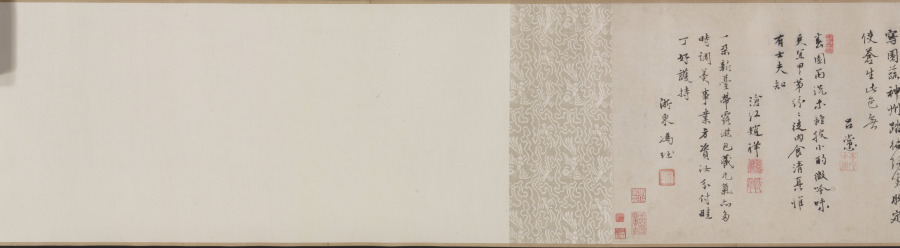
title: Chrysanthemums and Cabbage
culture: China, Ming dynasty (1368–1644)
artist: Tao Cheng (Chinese, active c. 1471–after 1502)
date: c. 1486 or before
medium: handscroll, ink and slight color on paper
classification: Painting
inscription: Artist's seal at beginning of painting: Yun hu 雲湖. Title by Wang Wenzhi 王文治 (1730–1802), date 1756. 2 seals of Wang Wenzhi 王文治 (1730-1802); 3 seals of Ku Yün (n. d.)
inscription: Section A (Chrysanthemums): 1 poem and 1 seal of Zhang Yuanzhen 張元禎 (1437–1507) - Jinshi, 1461; 1 poems and 3 seals of Ni Yue 倪岳 (1444–1501) - Jinshi, 1464; 1 poems and 2 seals of Zhao Xiang 趙祥 (life dates unknown) - Jinshi, 1469; 1 poems and 1 seals of Wu Xixian 吳希賢 (1437–1489) - Jinshi, 1464; 1 poems and 1 seals of Lü Chang 呂㦂 (1449–1511) - Juren, 1471; 1 poems and 3 seals of Fu Han 傅瀚 (1435–1502) - Jinshi, 1464; 1 poems and 1 seals of Feng Jue 馮珏 (life dates unknown) - Jinshi, 1478.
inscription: Chrysanthemums section, poem 1, by Zhang Yuanzhen 張元禎 (1437–1507): Several bushes of chrysanthemums grow in front of the Five-Willow Cottage,/ The yellow ones are really yellow and the white ones white./ This affable and decent fellow, young in years and unsophisticated,/ Has snapped one of the branches to dip in ink. (The Five-Willows Cottage was the home of the poet Tao Qian 陶潛 (Tao Yuanming 陶淵明, AD 365-427).) Chrysanthemums section, poem 2, by Ni Yue 倪岳 (1444–1501): Where at the Eastern Fence can you grieve for the Soul of the Xiang River?/ A man of upright character is mourned within the traces of ink./ White jade with a slight flaw would be a grievance forever,/ Later men should understand why even the roots of the flowers are washed. (Eastern Fence refers again to the poet Tao Qian 陶潛, while the Soul of the Hsiang River refers to the poet Qu Yuan 屈原 (c. 340–278 BC).) Chrysanthemums section, poem 3, by Zhao Xiang 趙祥 (life dates unknown): A clump of chrysanthemum grows in front of the bamboo pavilion,/ The winds of many autumns have blown since we parted beyond the river./ Straining wine through the official's cap of Tao [Qian] to prolong autumn's pleasures,/ The mists and clouds of ten thousand miles belong to the intoxicated. Chrysanthemums section, poem 4, by Wu Xixian 吳希賢 (1437–1489): It is a different spring if mulberry is planted during the latter part of the year,/ The dust of the world originally did not drop on clothing./ Who spills out ink under the Eastern Fence/ And paints so freely this portrait of chrysanthemums for the venerable Sir Tao? Chrysanthemums section, poem 5, by Lü Chang 呂㦂 (1449–1511): This full tray of ink for painting [flowers] at the Eastern Fence;/ Their whiteness or yellowness is not essential in capturing their beauty./ I don't have to go to Jiangnan to see them myself./ At my old house grow two or three branches. Chrysanthemums section, poem 6, by Fu Han 傅瀚 (1435–1502): Who daubed autumn flowers with ink/ As if they were dark dew on a branch tip only vaguely seen at evening?/ After the lazy clouds disperse, no one paints;/ A certain unconventionality pervades this painting. Chrysanthemums section, poem 7, by Feng Jue 馮珏 (life dates unknown): To satisfy his hunger, [the chrysanthemums] have at times entered the poetry of Qu Yuan;/ Taking up the wine cup, it felt close to Tao Qian./ [With them I am like] a lonely root sustained by deep water/ Or an old man to whose hair the color of youth returns.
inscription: Section B (Cabbage): 1 poem and 1 seal of Cai Qi 蔡圻 (life dates unknown) - degree information not known; 1 poems and 3 seals of Ni Yue 倪岳 (1444–1501) - Jinshi, 1464; 1 poem and 3 seals of Jiao Fang 焦芳 (1436–1517) - Jinshi, 1464; 1 poem and 3 seals of Li Dongyang 李東陽 (1447–1516) - Jinshi, 1464; 1 poems and 1 seals of Wu Xixian, signed “Xixian” 吳希賢 - Jinshi, 1464; 1 poems and 3 seals of Fu Han 傅瀚 (1435–1502) - Jinshi, 1464; 1 poems and 1 seals of Lü Chang 呂㦂 (1449–1511) - Juren, 1471; 1 poems and 2 seals of Zhao Xiang 趙祥 (life dates unknown) - Jinshi, 1469; 1 poems and 1 seals of Feng Jue 馮珏 (life dates unknown) - Jinshi, 1478.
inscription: Cabbage section, poem 1, by Cai Qi 蔡圻 (life dates unknown): The ink splashes are fresh from a frosty brush dipped in pond water;/ I can visualize that time when Yunhu 雲湖 [Tao Cheng] first showed his talents./ I lament the places where I scribbled before,/ Who would open them to inscribe a poem? (The first line is an allusion to the famous Jin dynasty calligrapher Wang Xizhi 王羲之 (AD 303-361), who practiced calligraphy so diligently at the edge of a pond that the water turned black with ink.) Cabbage section, poem 2, by Ni Yue 倪岳 (1444–1501): After rain the vegetables begin to grow;/ How are the colors of the masses lately!/ Once you get used to them, the tastiest parts are the ends of the roots;/ I don't know if they can be used for "seasoning soup." ("Seasoning soup" is an allusion to the statesmanship of a chief minister.) Cabbage section, poem 3, by Jiao Fang 焦芳 (1436–1517): This crop of purple stalks and green leaves is late and irregular;/ Now the rainy season is over for the Eastern Garden./ All the nobles nowadays dine on meat;/ Who of them knows the flavor of this [cabbage]. Cabbage section, poem 4, by Li Dongyang 李東陽 (1447–1516): It's always helped the honest man to sober up after drinks./ I intend to go to the deepest part of the stream-crossed garden/ To refresh myself in the fragrance and dew of evening. Cabbage section, poem 5, by Wu Xixian 吳希賢 (1437–1489): After rain, the white silk is filled with fragrant vegetables;/ How many times this happens in Mr. Tao's paintings./ On whom will you depend to present a memorial to the ruler?/ Don't let this color emerge on the faces of the people. (The last line is meant as a warning to officials: the color of the vegetables (green) may be pleasing in itself, but when it emerges on the faces of the starving poor, it signifies a badly governed world.) Cabbage section, poem 6, by Fu Han 傅瀚 (1435–1502): For twenty years I have feasted on the excellent mutton of an official;/ Yet I talk and dream about the garden and its vegetables./ Do not merely say it is good to chew the root of the cabbage--/ You must taste to understand what poverty is. Cabbage section, poem 7, by Lu Chang 呂㦂 (1449–1511): The capital is never a place for an apprentice in the "garden of scholarship."/ Who would write about gardens and vegetables on an examination paper?/ I've walked throughout the country in spring;/ Make sure the people don't show this color. Cabbage section, poem 8, by Zhao Xiang 趙祥 (life dates unknown): After a wash of rain, the spring garden is still in order;/ The flavor [of the cabbage] is more suitable with a small drink and the hum of a tune./ The rich and powerful in their mansions consume dish after dish of meat;/ Vegetarian food is known only by the scholars. Cabbage section, poem 9, by Feng Jue 馮珏 (life dates unknown): A new cabbage is nourished with dew;/ It takes a long time to grow and mature./ The business of "seasoning the soup" is your responsibility;/ Better command the gardener to take care [of the cabbages]. trans. HK/LYSL/WKH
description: On an autumn day in Beijing, Tao Cheng had a gathering with a group of scholar-officials and created two paintings in a spontaneous, casual style. The first depicts chrysanthemums, slender bamboo stalks, and a rock in monochrome ink. Tao applied light colors for the second painting that depicts cabbage. Tao deliberately placed the images on the first sections of the paper so that his honorable guests could add their poetic inscriptions inspired by his imagery. In the first section to the right, all seven poetic inscriptions refer to the beloved poet and recluse Tao Qian (also called Tao Yuanming, AD 365–427) who was particularly known for his profound love for chrysanthemum flowers. Most of the inscriptions in the second section express sympathy for the poor, since cabbage is the main ingredient in their humble food. Taken together, the poems and paintings allude to the life and responsibilities of the scholar-official: the importance of both an upright character and a concern for the poor citizens in order to achieve good government.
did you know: Eminent calligrapher Wang Wenzhi 王文治 was only 27 sui when he wrote the title in 1756.